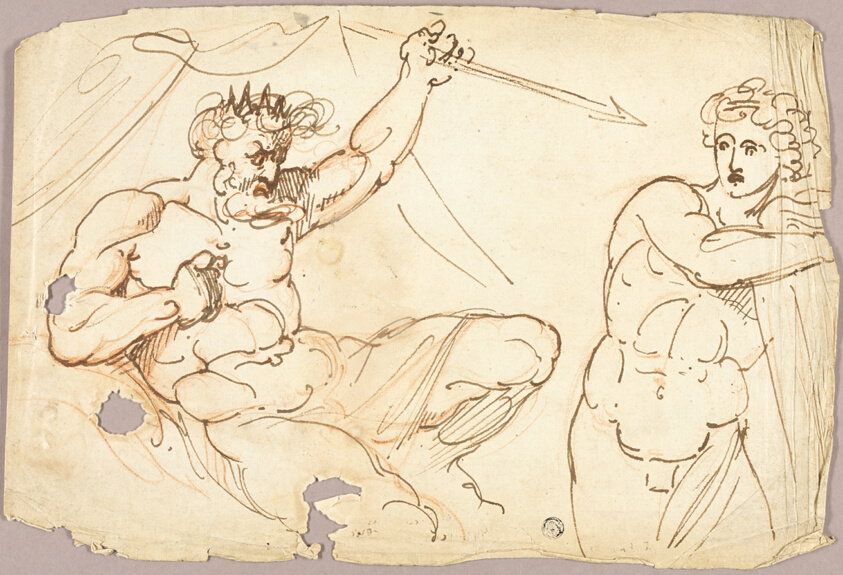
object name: Drawing and Watercolor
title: Saul and David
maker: Baccio Bandinelli (Italian, 1493-1560)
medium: Pen and brown ink, with red chalk, on cream laid paper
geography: Italy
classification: pen and ink drawings; paper; drawings (visual works); prints and drawing